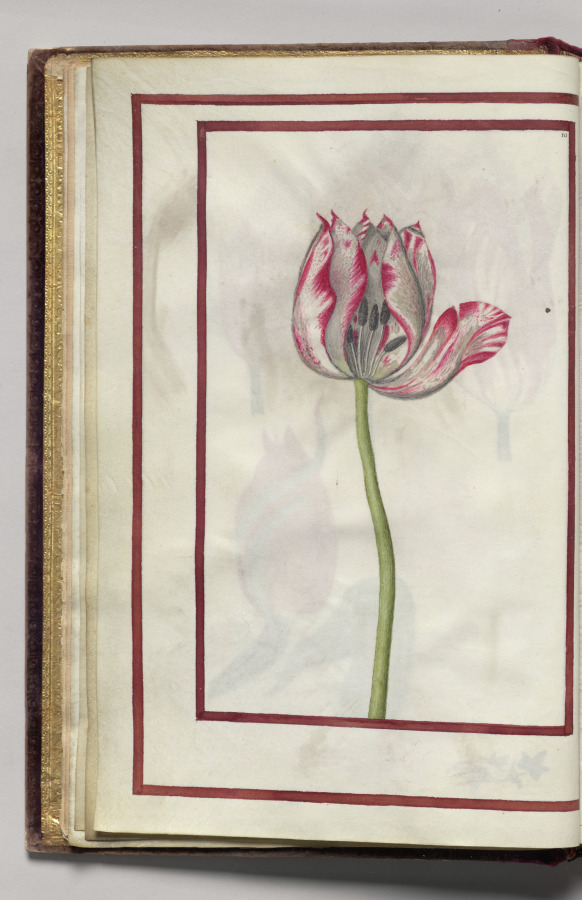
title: Tulip Section, folio 5 (verso), from Florilegium (A Book of Flower Studies)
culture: France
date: 1608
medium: watercolor, ink, silver, and gold over occasional traces of pencil, on vellum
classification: Bound Volume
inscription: Dated: Poitiers 1608 (on frontispiece) Signed: On frontispiece in black ink, lower right: Van Kuyk Notation on drawing: Frontispiece: in pencil, lower margin: * élève de Van Kessel, peintre flammand (* in pencil also appears in front of Van Kuyk's name).